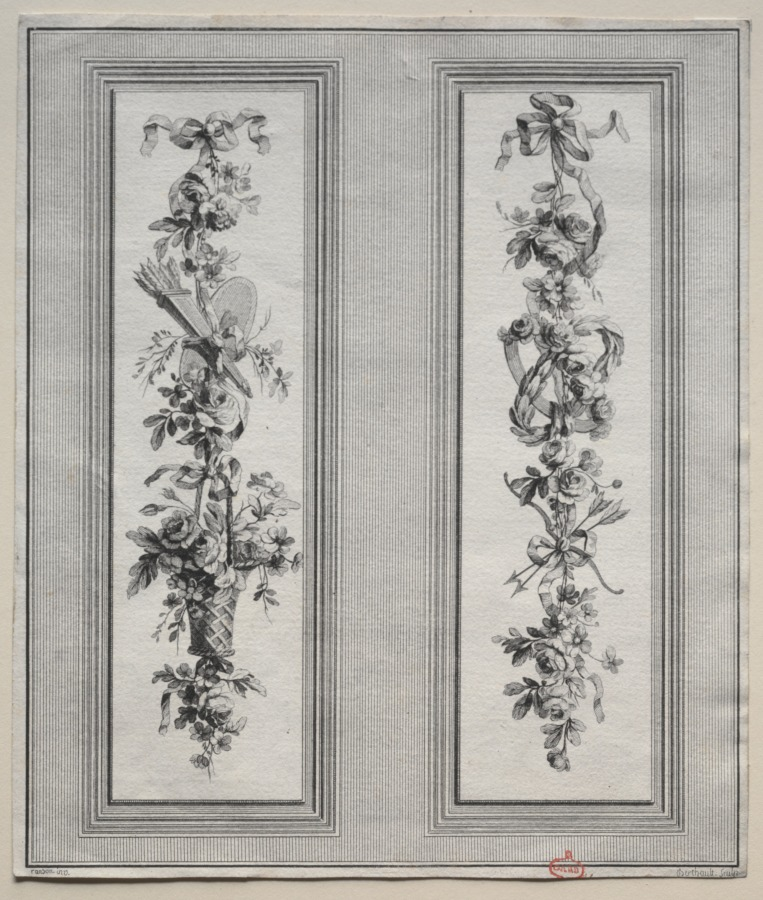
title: Garden Ornament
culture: France, 18th century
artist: Pierre Gabriel Berthault (French, 1748–1819)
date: c. late 1700s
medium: engraving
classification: Print